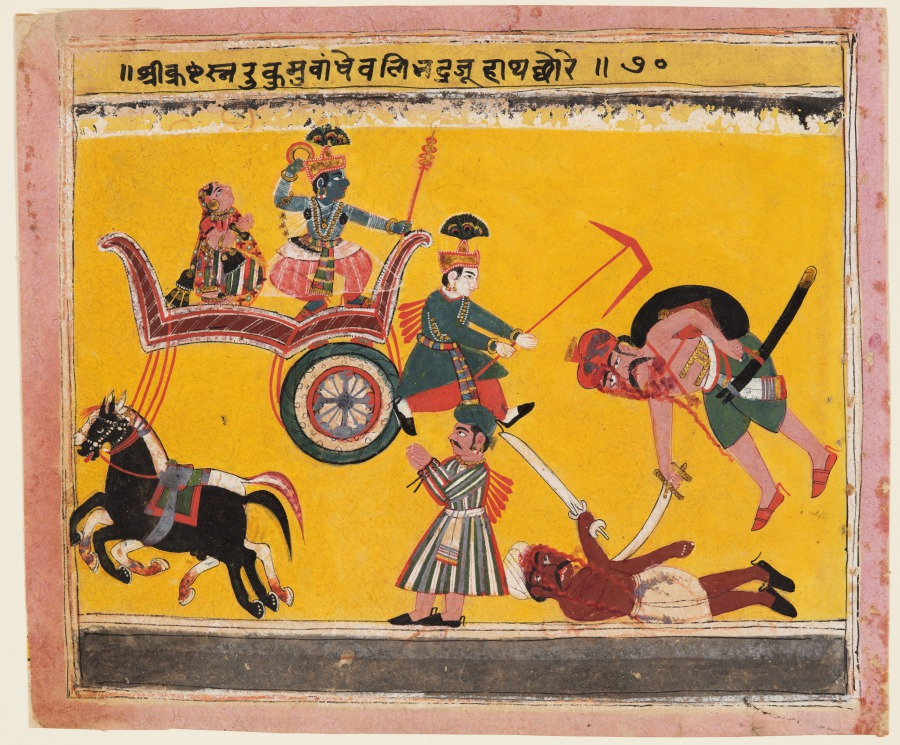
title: Abduction of Rukmini: Krishna Tied the Hands of Rukma, from a Bhagavata Purana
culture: Central India, Madhya Pradesh, Malwa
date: c. 1640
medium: Gum tempera, ink, and gold on paper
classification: Painting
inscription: ṣrī krachasna rukumu baṃdhe balibhadra jū hātha chore. 70.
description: Krishna eloped with Rukmini against her brother Rukma’s will. Rukma, in the striped tunic (jama), soon chased him down and challenged him to a battle. Knowing that Krishna would murder her brother, Rukmini pleaded with Krishna to spare his life, so Krishna tied his hands with a piece of cloth, and Krishna’s brother Balarama later freed him.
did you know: The white Balarama slayed two of Rukma’s followers with his plow.